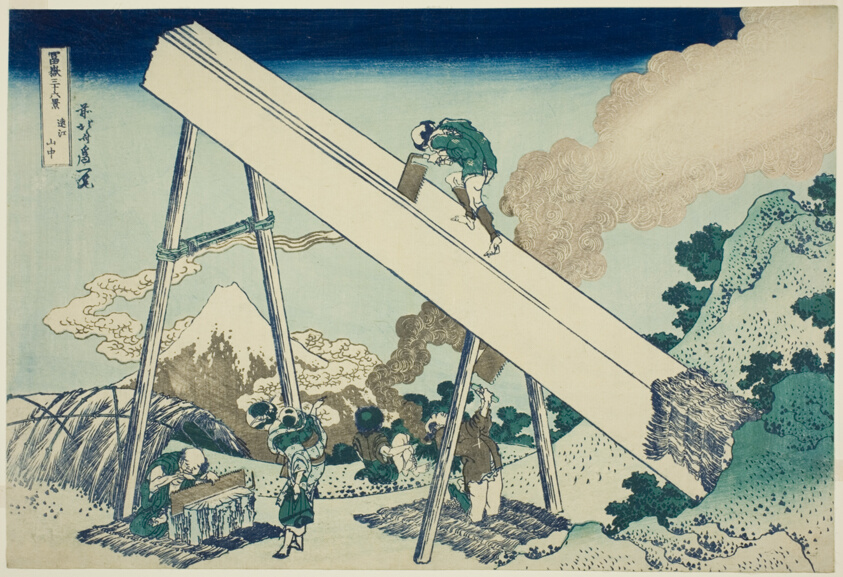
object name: Print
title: In the Mountains of Totomi Province (Totomi sanchu), from the series "Thirty-six Views of Mount Fuji (Fugaku sanjurokkei)"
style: Japanese (culture or style)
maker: Katsushika Hokusai 葛飾 北斎; Japanese, 1760-1849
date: c. 1830/33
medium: Color woodblock print; oban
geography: Japan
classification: woodblock print; print; asian art